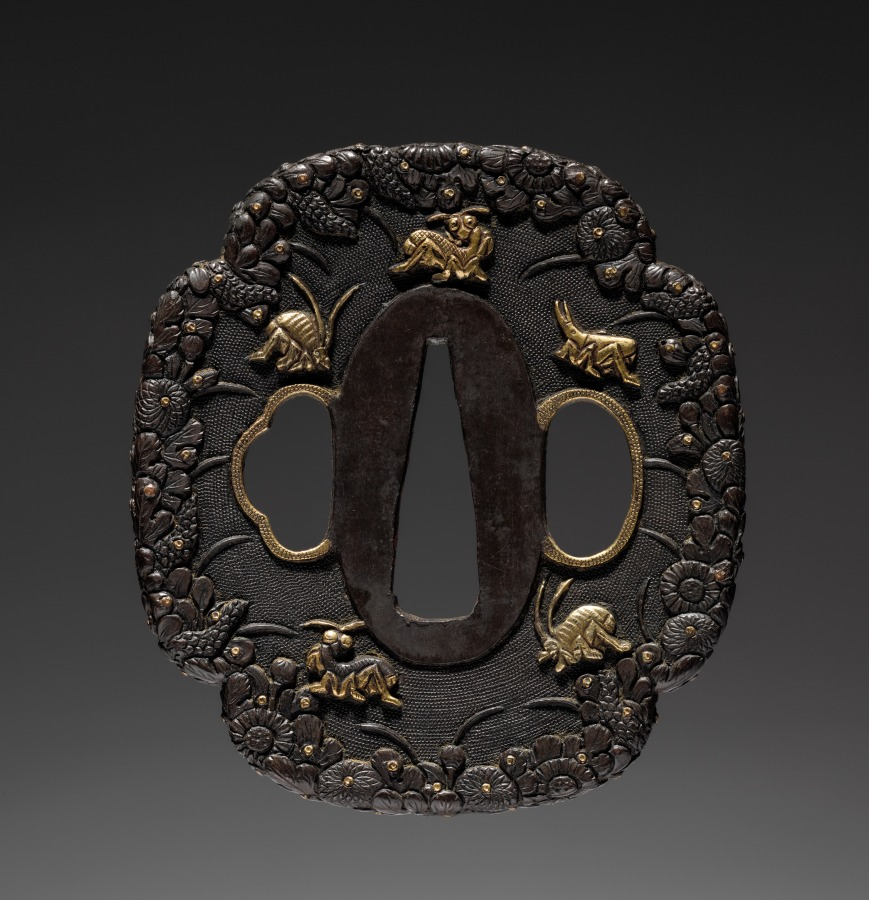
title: Sword Guard (Tsuba) with Crickets and Chrysanthemums in Dew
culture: Japan, possibly Edo period (1615–1868)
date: c. 1615–1868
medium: metal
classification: Arms and Armor